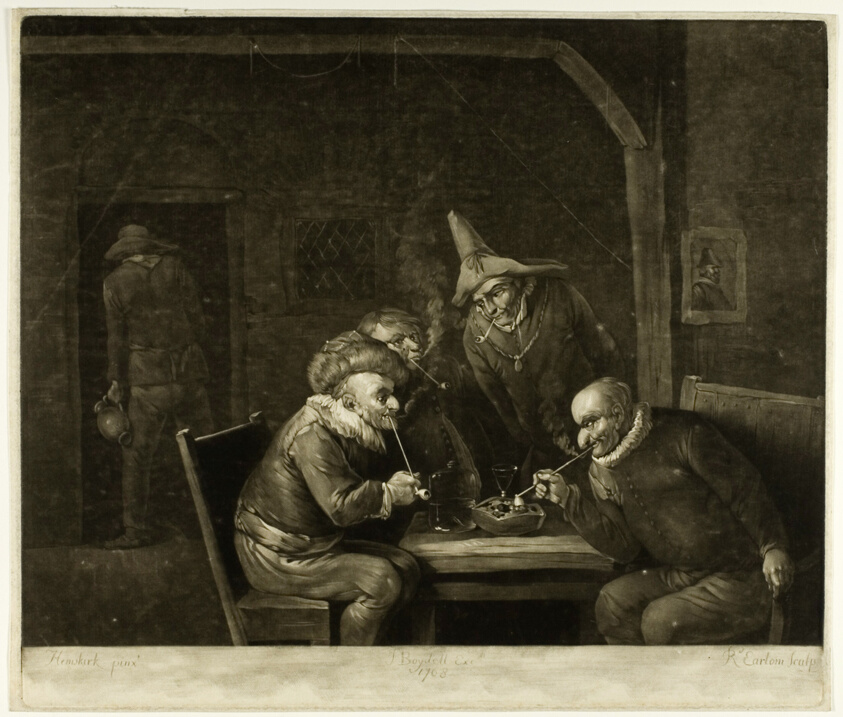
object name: Print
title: The Story Tellers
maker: Richard Earlom (British, 1743-1822); after Egbert van Heemskerck II (Dutch, 1634/5-1704); published by John Boydell (British, 1719-1804)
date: published 1768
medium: Mezzotint on ivory laid paper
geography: England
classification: mezzotint; print; prints and drawing